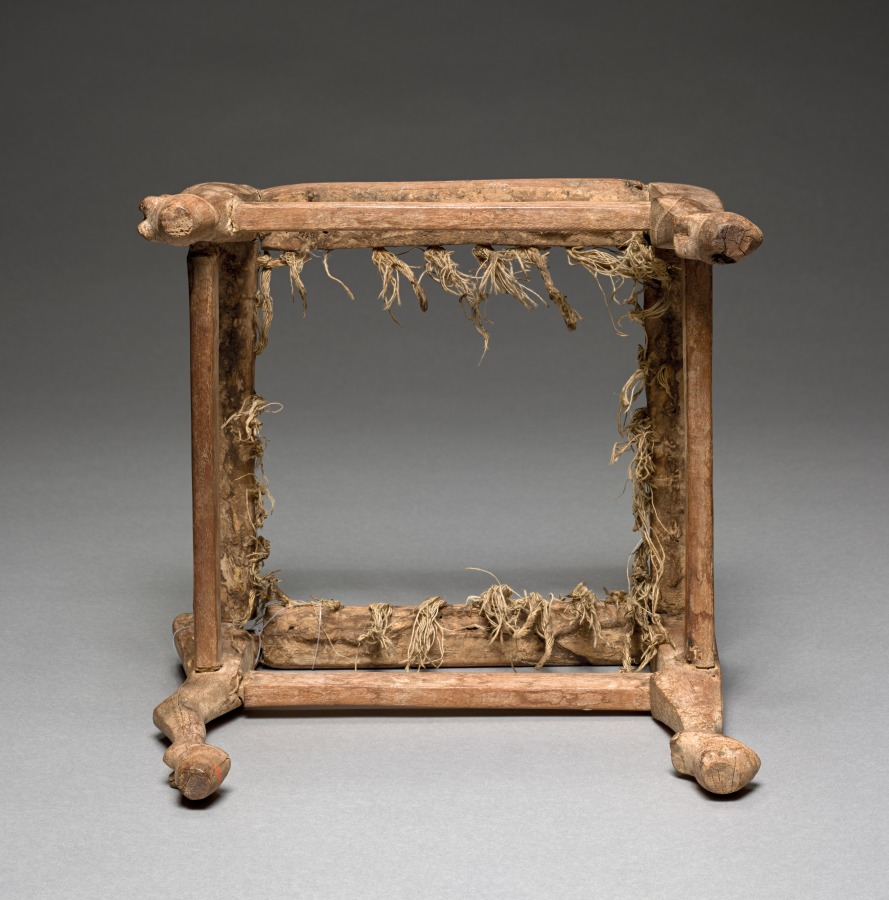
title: Child's Stool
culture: Egypt, New Kingdom (1540–1069 BCE), Dynasty 19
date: 1295–1188 BCE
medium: wood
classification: Funerary Equipment